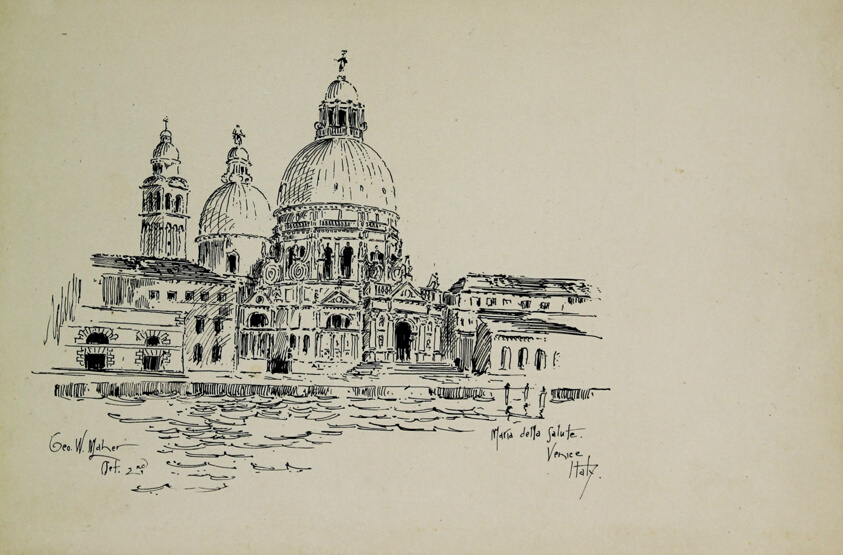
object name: Architectural Drawing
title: Sta. Maria della Salute, Venice, Italy, Travel Sketch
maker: George Washington Maher (American, 1864–1926)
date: 1891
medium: Ink on heavy paper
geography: United States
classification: pen and ink drawings; drawings (visual works); architecture; architectural drawing